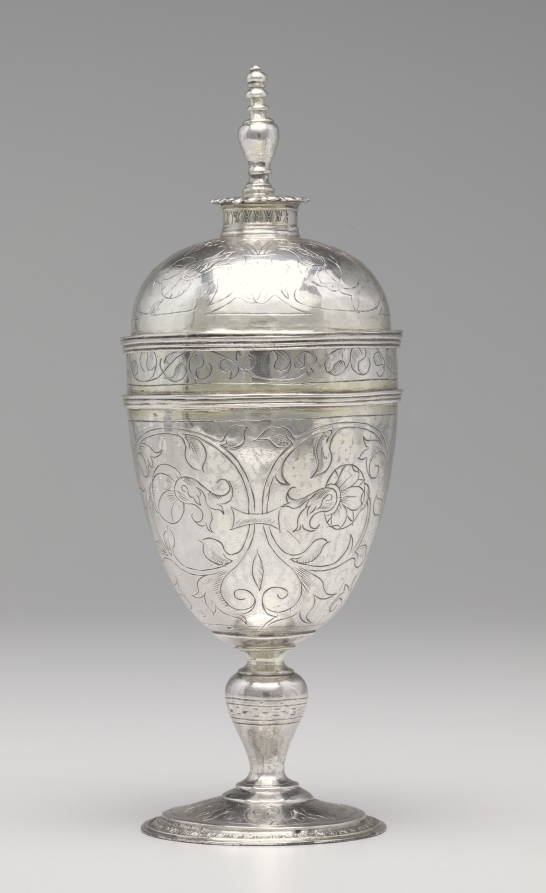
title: Standing Cup and Cover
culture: London, England, late 16th century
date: 1593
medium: silver, partially gilt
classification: Silver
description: Produced during the last years of the Tudor dynasty (1485–1603), this vessel exemplifies the symmetrical patterns, horizontal designs, and clear division of space typical of English silverwork at the time. The functional shape and ornamental designs characteristic of standing cups made them ideal for ceremonial occasions.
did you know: Often made for members of guilds and trade associations in London, standing cups were frequently used during toasts.